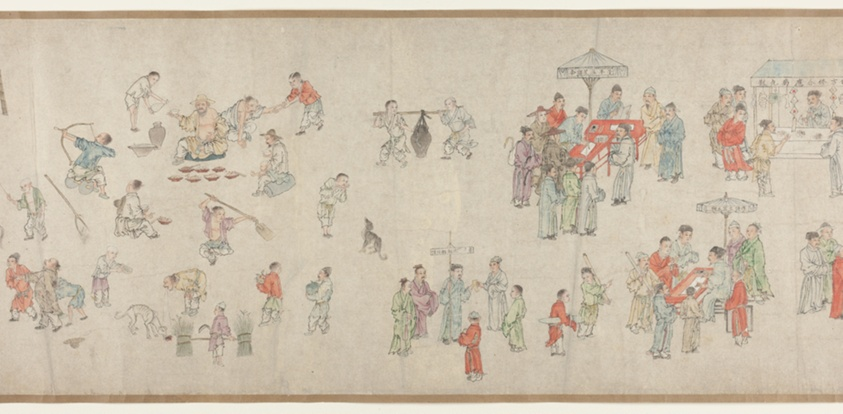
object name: Painting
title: Street Scenes in Times of Peace 太平風會圖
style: Chinese (culture or style)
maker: Zhu Yu (Zhu Junbi) 朱玉（朱君璧）; Chinese, 1293-1365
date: Yuan dynasty (1279–1368), 14th century 元朝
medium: Handscroll; ink and colors on paper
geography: China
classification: handscroll; painting; asian art